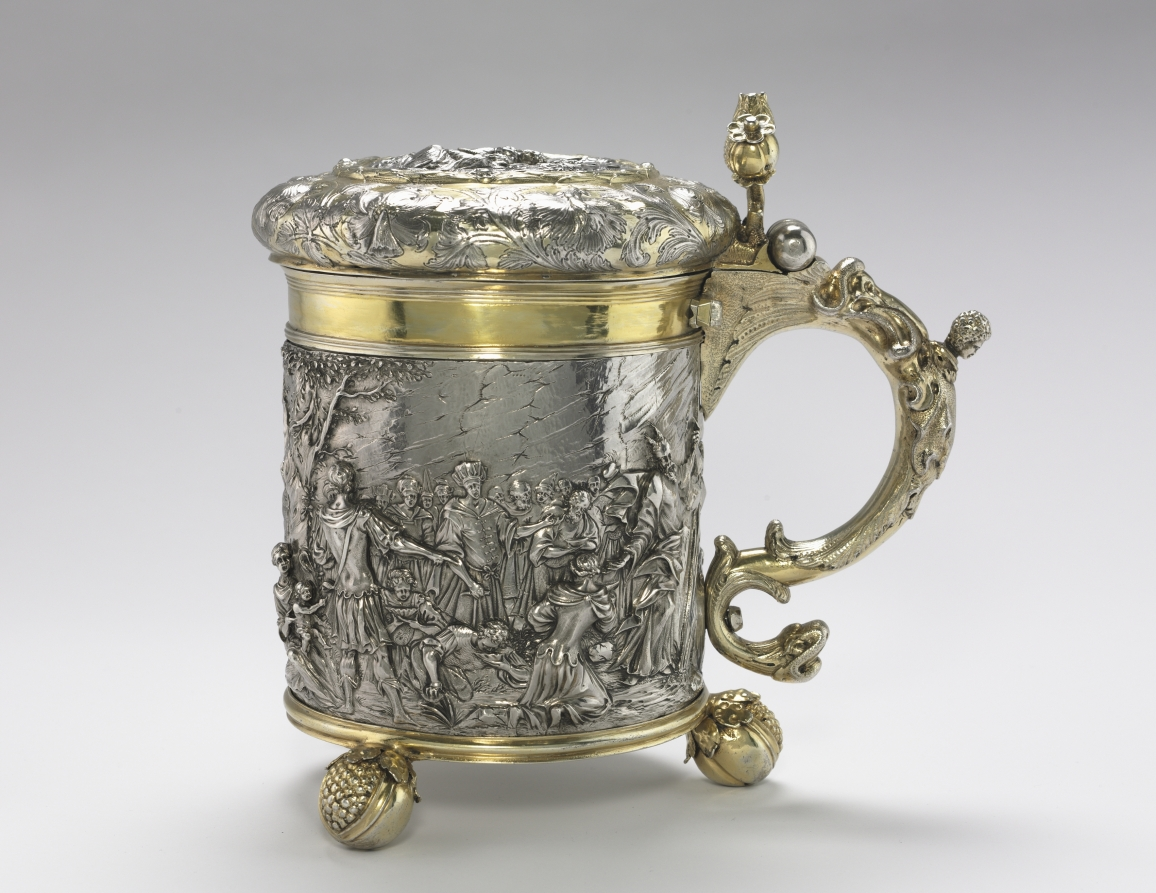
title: Tankard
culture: Germany, Augsburg, 17th century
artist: Andreas Brachfeldt (Russian, born Latvia, active 1661–1697)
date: c. 1680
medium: cut and seamed silver sheet, repoussé and chased ornament, cast handle and feet, partially gilded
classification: Metalwork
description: Tankards of this form were made toward the end of the 1600s in various port cities rimming the Baltic Sea. This example is enriched with a detailed scene of Moses striking the rock, executed in Augsburg, Germany, in about 1675–78.